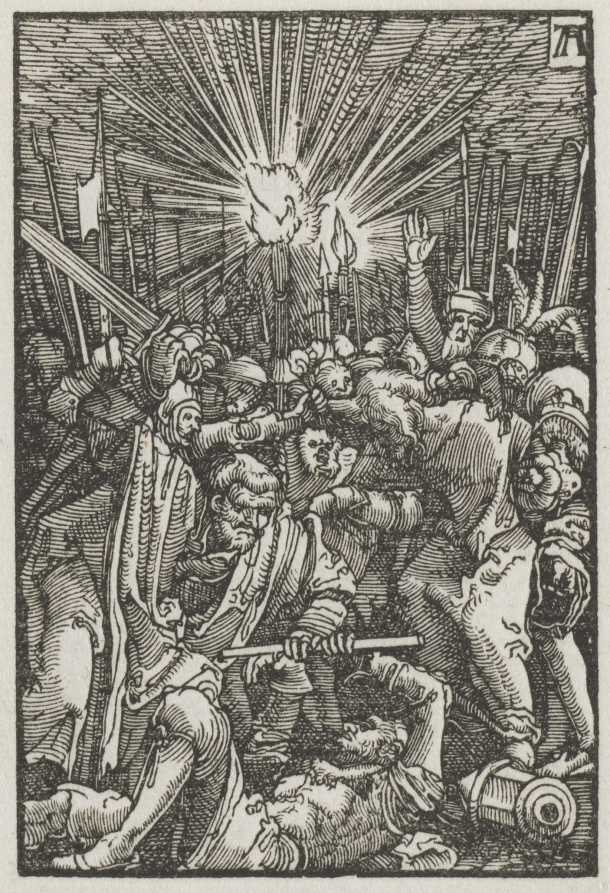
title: The Fall and Redemption of Man: Christ taken captive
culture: Germany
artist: Albrecht Altdorfer (German, c. 1480–1538)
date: c. 1515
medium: woodcut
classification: Print